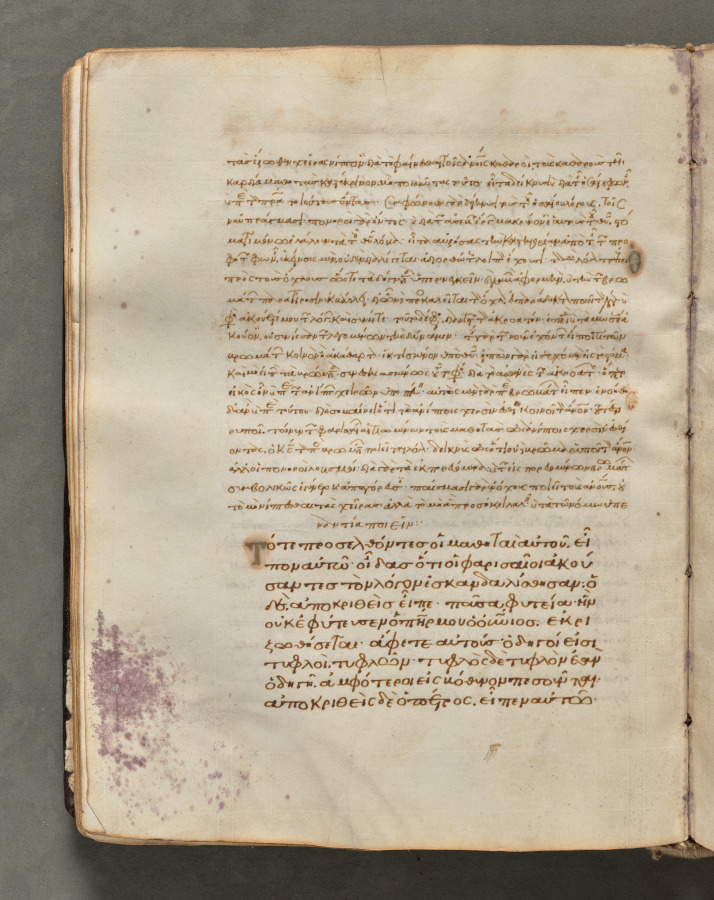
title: Text, folio 68 (verso), from a Gospel Book with Commentaries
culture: Byzantium, Constantinople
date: c. 1000–1100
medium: ink, tempera, and gold on vellum; leather binding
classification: Bound Volume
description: Each of the four gospels in this book opens on a page with brilliantly illuminated borders depicting the author of the text as well as birds-principally peacocks, symbols of the immortality of the soul-and fountains, representing the fountain of life and the salvation of the soul. This volume consists of 428 leaves with texts in Greek. Its level of sophistication suggests that it was probably written and decorated in a monastery in Constantinople.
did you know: Gospel Books were carried in procession through Byzantine churches.